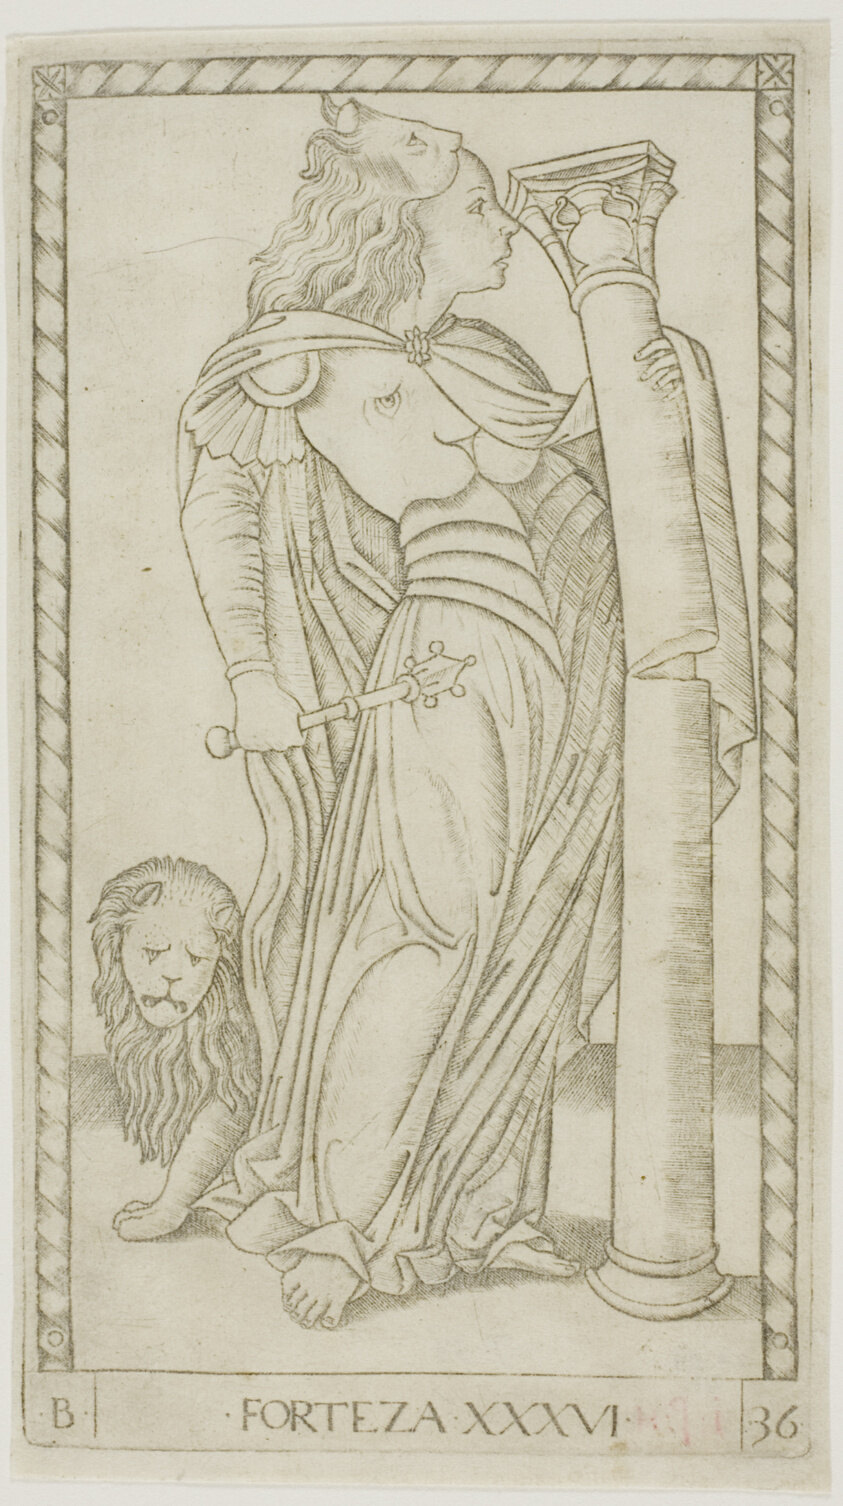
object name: Print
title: Fortitude, plate 36 from Genii and Virtues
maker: Master of the E-Series Tarocchi (Italian, active c. 1465)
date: c. 1465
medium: Engraving in black on cream laid paper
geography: Italy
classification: engraving; print; prints and drawing